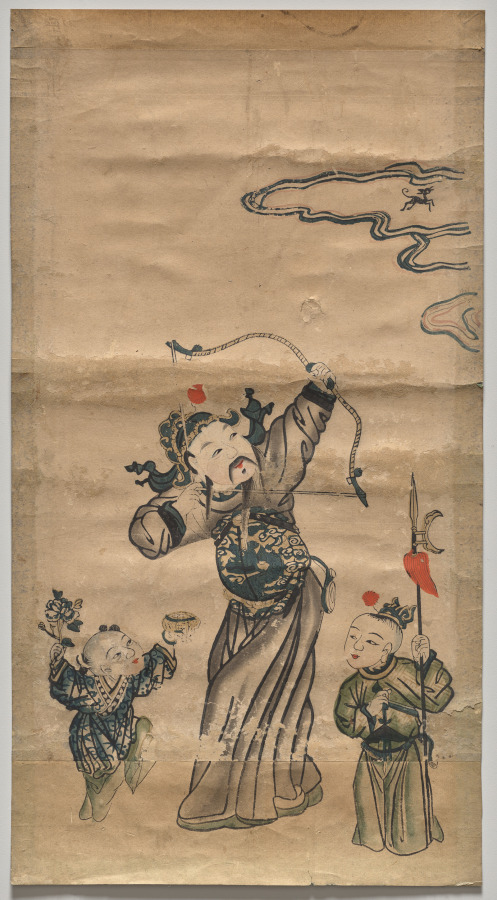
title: Zhang Xian Shoots the Heavenly Dog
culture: China, Qing dynasty (1644–1911), Daoguang reign (1821–50)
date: 1821–50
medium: Polychrome woodblock print; ink and color on paper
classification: Print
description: In the 1600s, printing flourished in such Jiangnan cities as Nanjing, Suzhou, Hangzhou, and Huizhou, evolving from privately enjoyed illustrated books printed in color to more commercialized single-sheet color prints that were hung on walls and became part of the rich urban visual culture.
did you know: Woodblock printing in color reached a height in China in the 1600s to 1700s. The prints were executed by means of sets of separate blocks, each carved to print a different color.